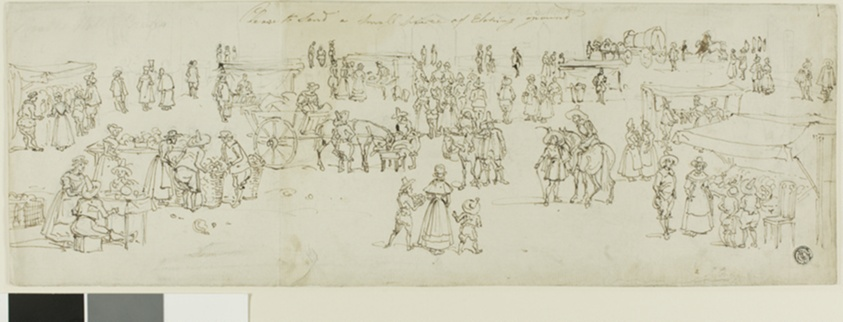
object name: Drawing and Watercolor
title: Dutch Market or Fair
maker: John Coney (English, 1786-1833)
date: c. 1820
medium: Pen and brown ink over graphite, on ivory laid paper, partially laid down on ivory wove paper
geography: England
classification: pen and ink drawings; drawings (visual works); prints and drawing